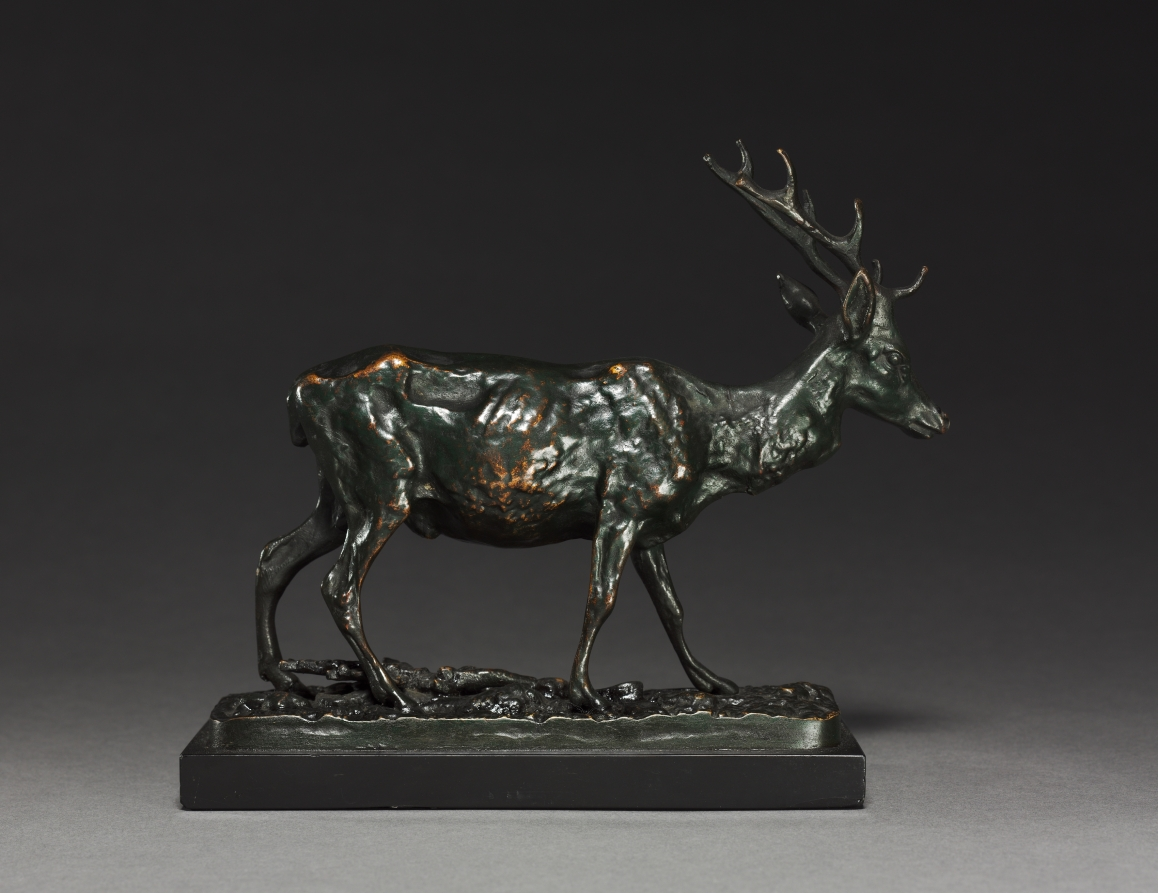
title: Deer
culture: France, 19th century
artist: imitator of Antoine-Louis Barye (French, 1796–1875)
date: after 1830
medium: bronze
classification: Sculpture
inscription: Signed: "Barye"